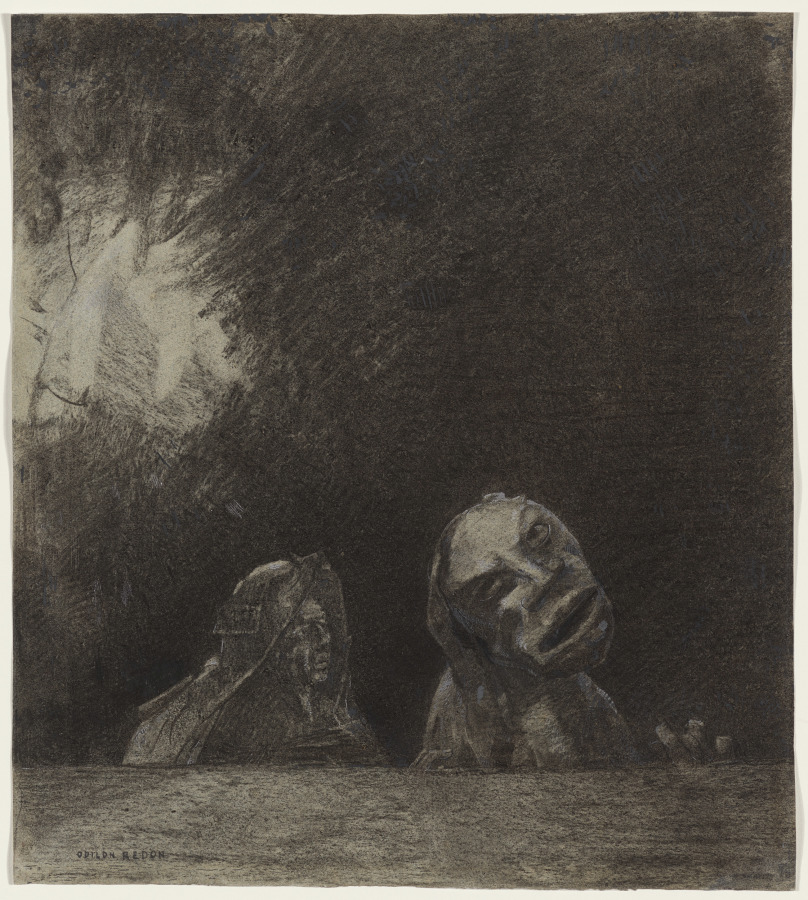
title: Quasimodo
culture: France, 19th century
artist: Odilon Redon (French, 1840–1916)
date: c. 1875–80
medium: charcoal with fabricated black chalk and touches of white and gray gouache on gray wove paper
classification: Drawing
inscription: signed, lower left, in black ink: ODILON REDON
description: The nineteenth-century French artist Odilon Redon was known for works defined by their darkness—both the black materials he used and the mood of his fantastical themes. This drawing depicts Quasimodo, the protagonist of Victor Hugo’s 1831 novel The Hunchback of Notre Dame, but does not directly relate to the text. Redon layered and rubbed away charcoal marks to create the indeterminate space behind the pair.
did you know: Victor Hugo, the author who inspired this drawing’s subject, also made drawings with black materials inspired by his own imagination, much like Redon’s own work.